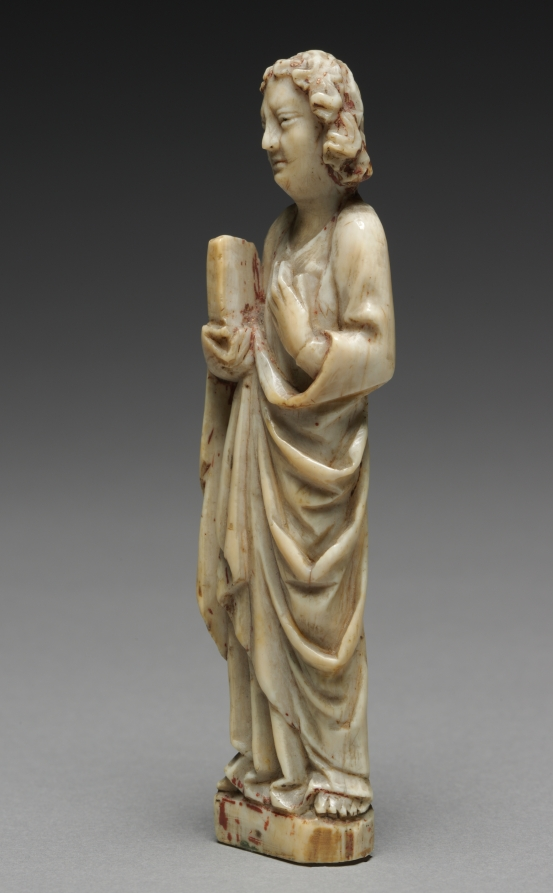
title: Saint John the Evangelist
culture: Germany or Moravia, 14th century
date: c. 1325–1330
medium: ivory with traces of paint and gilding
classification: Ivory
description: This figure with a Virgin and Crucified Christ (now lost) formed a Crucifixion group within a shrine.